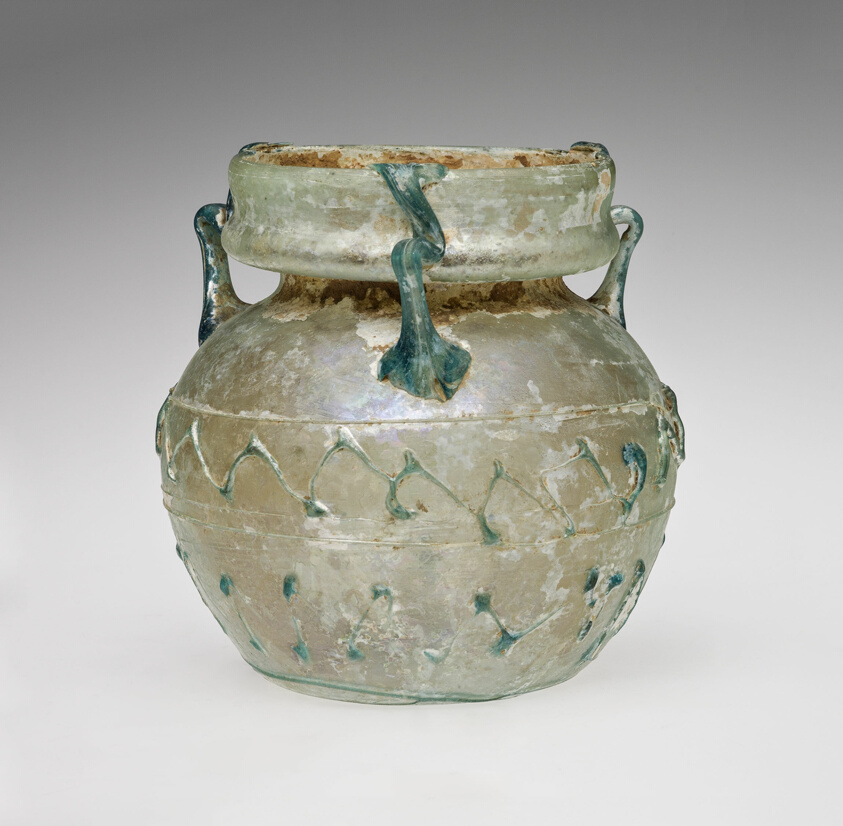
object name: Vessel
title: Jar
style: syrian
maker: Late Roman or early Byzantine; coast of Syria or Palestine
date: 4th-5th century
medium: Glass, blown technique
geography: Syria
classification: vessel; glass; ancient art